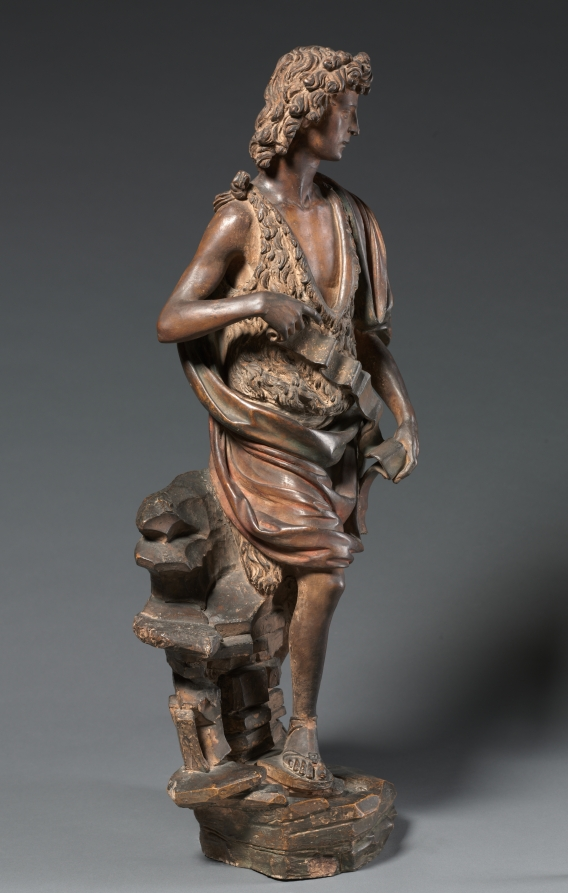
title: Saint John the Baptist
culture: Italy, Florence, 16th century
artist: Master of the Saint John Statuettes (Italian)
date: c. 1500–1525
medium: terracotta with traces of polychromy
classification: Sculpture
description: This statuette belongs to a group of terracotta sculptures representing David (from the OldTestament) and Saint John (from the New Testament) produced by a still unidentified Florentine artist and his studio in the late 1400s and early 1500s. Giventheir scale, it seems likely that these sculptures were intended for use in private homes rather than churches.